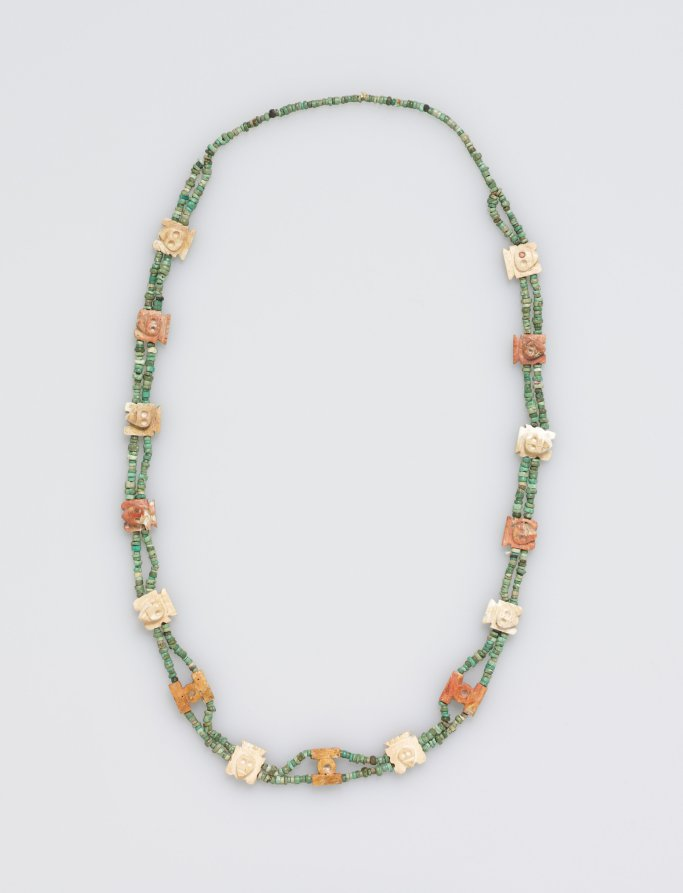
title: Necklace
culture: Peru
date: before 1532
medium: turquoise beads and bone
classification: Jewelry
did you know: These ancient beads were restrung in modern times.